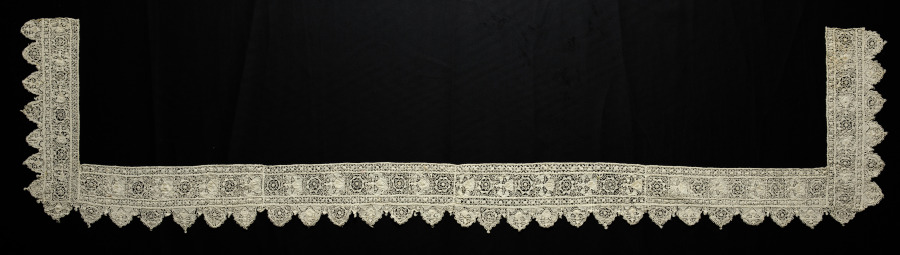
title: Lace Edging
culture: Italy, 1600s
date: 1600s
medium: Linen: needle lace (reticella)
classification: Lace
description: In this piece of lace edging, squares with a geometric design alternate with a motif of a bee, the symbol of the Barberini family.